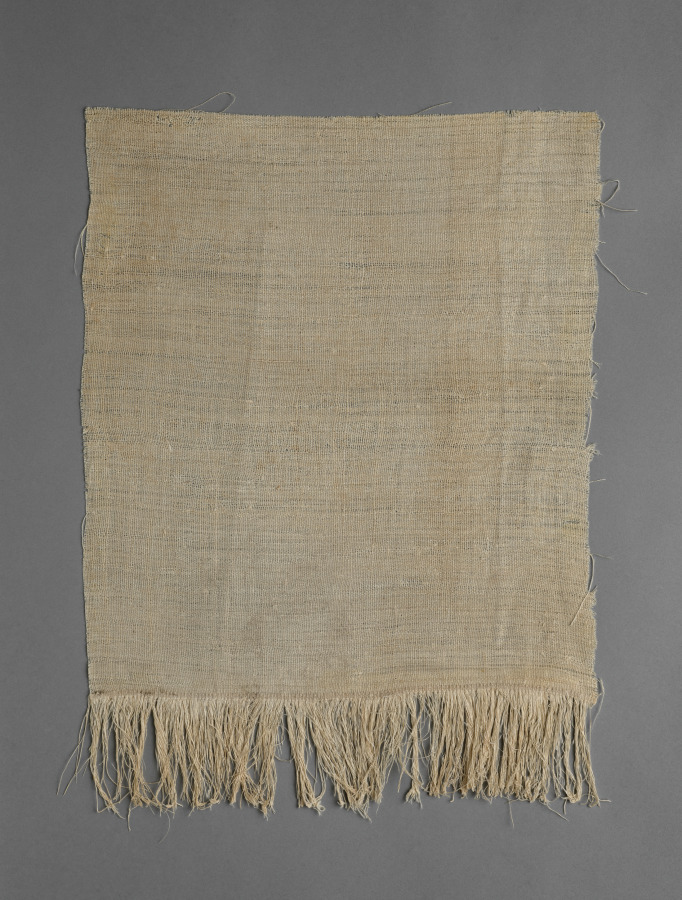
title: Mummy Linen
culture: Egypt, New Kingdom (1540–1069 BCE), Dynasty 18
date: 1550–1291 BCE?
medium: plain weave: linen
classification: Textile